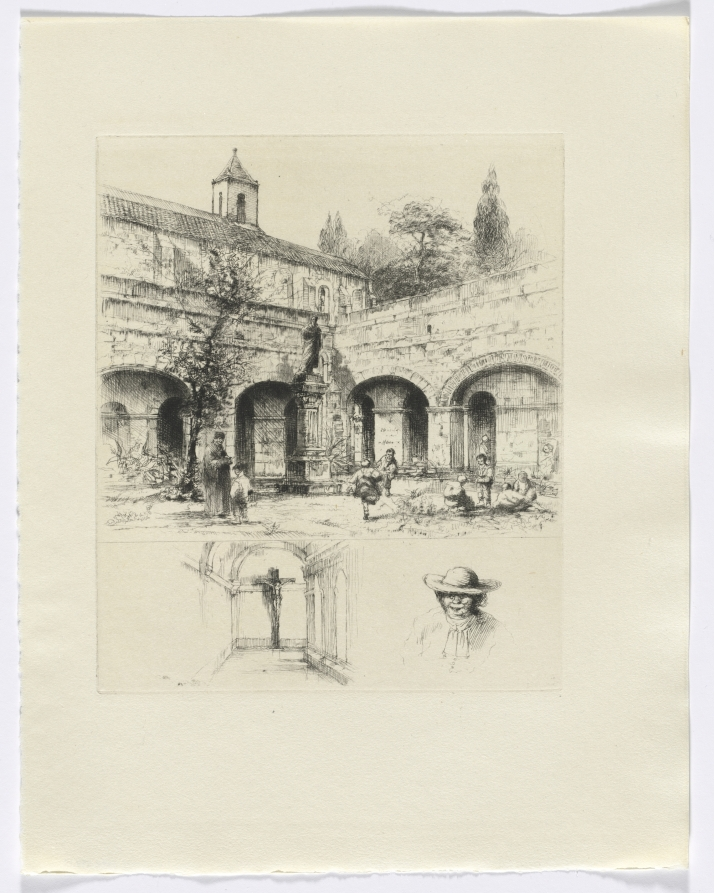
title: Frédéric Mistral: Mémoires et Recits by Frédéric Mistral: figures in a cloister/ crucifix and bust of a man (insert after p. 56)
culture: France, 20th century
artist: Auguste Brouet (French, 1872–1941)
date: 1937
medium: etchings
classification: Portfolio